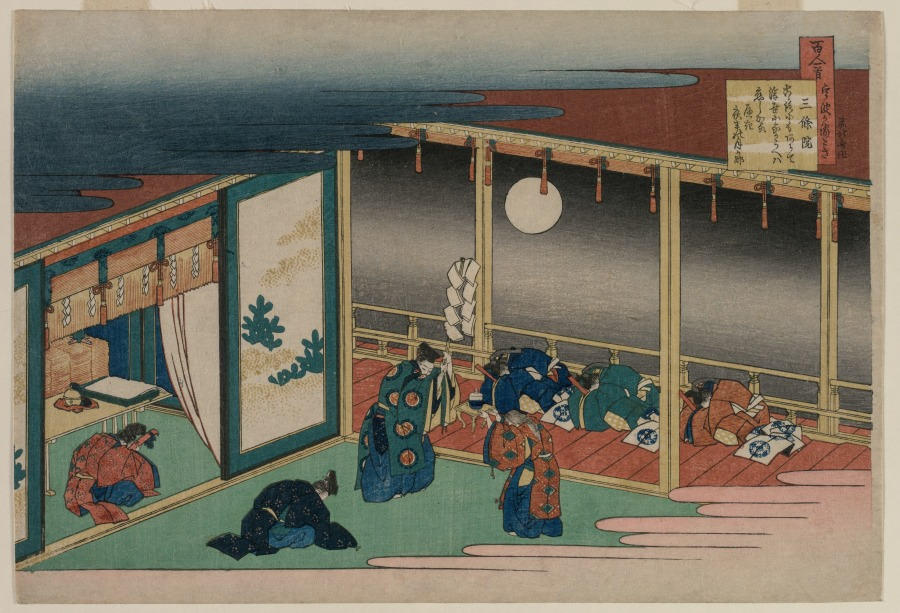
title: Poem by Emperor Sanjo, from the series One Hundred Poems by One Hundred Poets Explained by an Old Nurse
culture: Japan, Edo period (1615–1868)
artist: Katsushika Hokusai (Japanese, 1760–1849)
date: 1835–36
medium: color woodblock print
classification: Print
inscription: Kokoro ni mo / arade uki yo ni / nagaraeba / koishikarubeki / yowa no tsuki kana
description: A priest raises a gohei, a ritual implement with zig-zag strips of white paper attached to a staff, while the surrounding figures reverentially bow in a moonlit ceremony honoring Emperor Sanjo (976–1017, reigned 1012–16).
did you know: This series by Hokusai was originally meant to have 100 prints, but only 27 were completed.